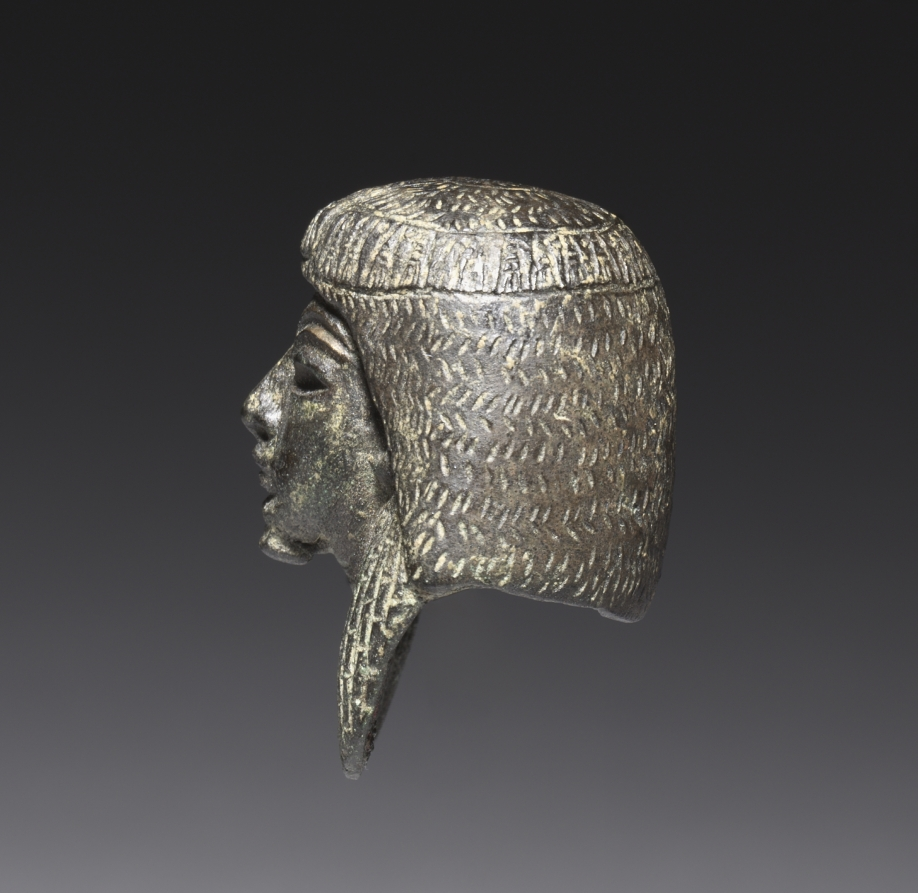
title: Bronze mount from a "Shawabty Bundle": Head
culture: Egypt, Thebes, Wadi Qubbanet el-Qirud, New Kingdom (1540–1069 BCE), Dynasties 18–19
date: c. 1336–1256 BCE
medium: head; bronze face, black copper wig, with traces of gilding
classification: Funerary Equipment